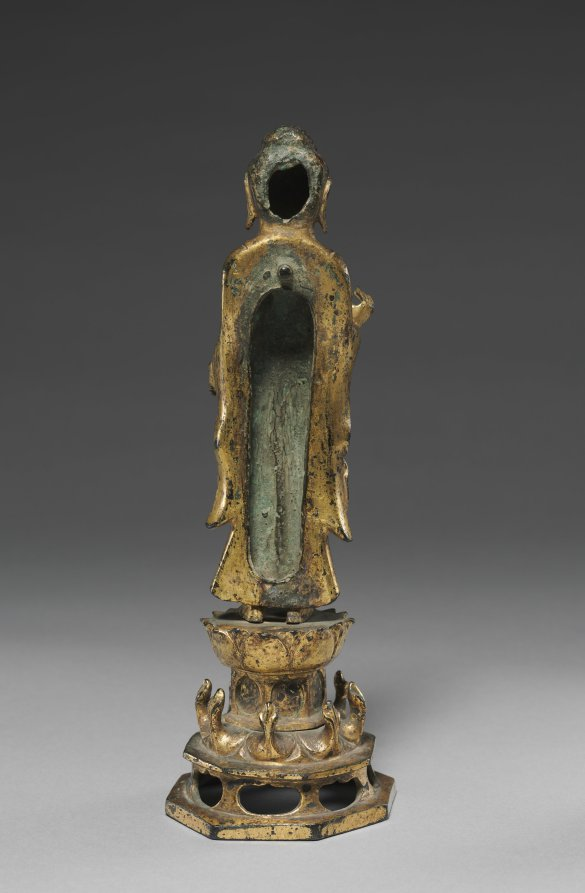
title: Statue of Amitabha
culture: Korea, Unified Silla period (676-935)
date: 800s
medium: gilt bronze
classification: Sculpture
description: This small sculpture shows Amitabha, the Buddha of the Western Paradise and the focus of the Pure Land sect of Buddhism, which was popular across East Asia, including Korea. This deity is recognizable from its right hand raised palm out in a gesture that reassures viewers to have no fear.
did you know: Small statues like this work were designed to be portable, rather than to be permanently housed in a Buddhist temple.